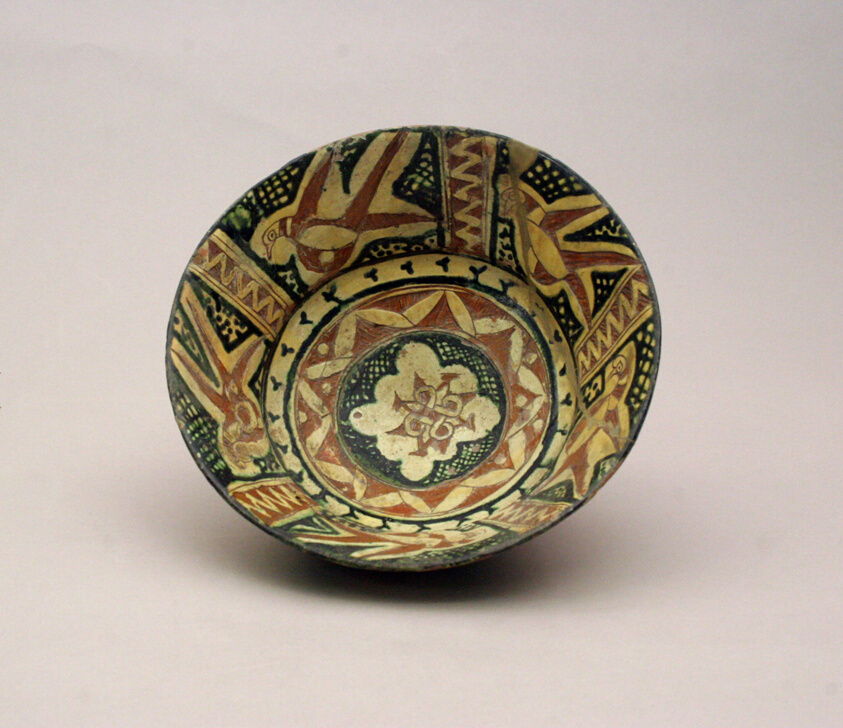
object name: Ceramics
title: Bowl with Incised Decoration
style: amol, abbasid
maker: Iran; Probably Nishapur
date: 10th/11th century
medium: Earthenware with incised decorations and polychrome painting under transparent glaze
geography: Iran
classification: ceramics; asian art; decorative arts